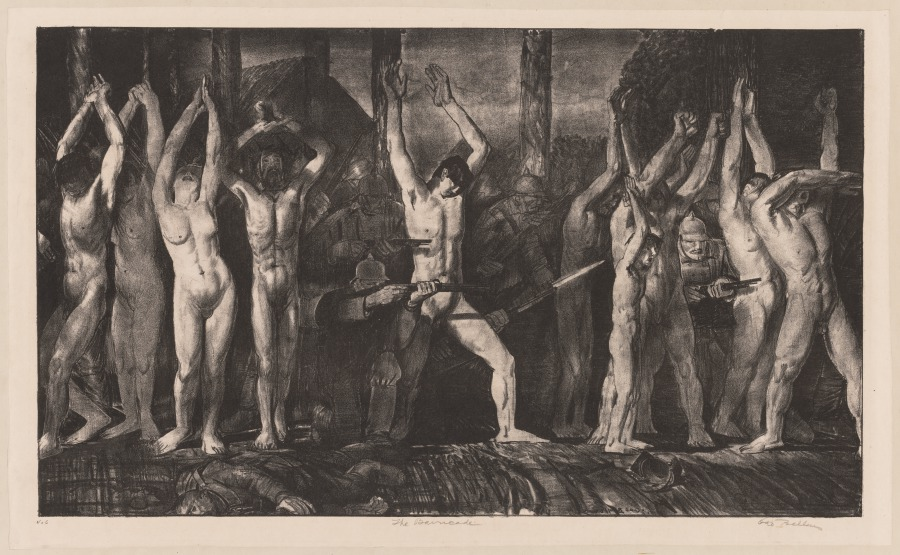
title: The Barricade, Second Stone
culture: America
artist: George Bellows (American, 1882–1925)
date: 1918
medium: lithograph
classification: Print